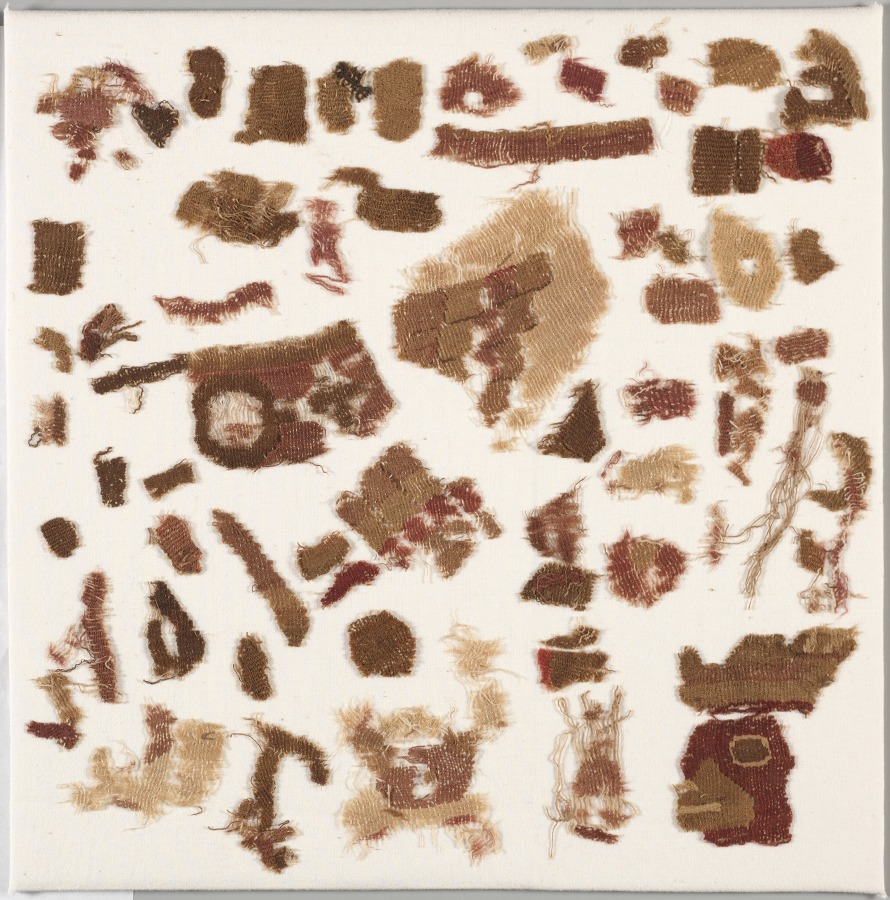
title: Textile Fragments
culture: Peru, Moche, north coast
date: c. 50–650 CE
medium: cotton and camelid fiber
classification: Textile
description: These fragments are rare survivors of catastrophic rains that destroyed much of the Moche textile legacy and may have helped to bring about the decline of Moche culture. Each depicts a serpent and a snail beneath a hovering raptorial bird—perhaps a snail kite, a type of hawk named after its favored food. The size of the motifs implies that the original textile was large; a mantle (a shawl-like garment) or a hanging are among the possibilities.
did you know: These fragments are rare survivors of floods that destroyed much of the Moche textile record.